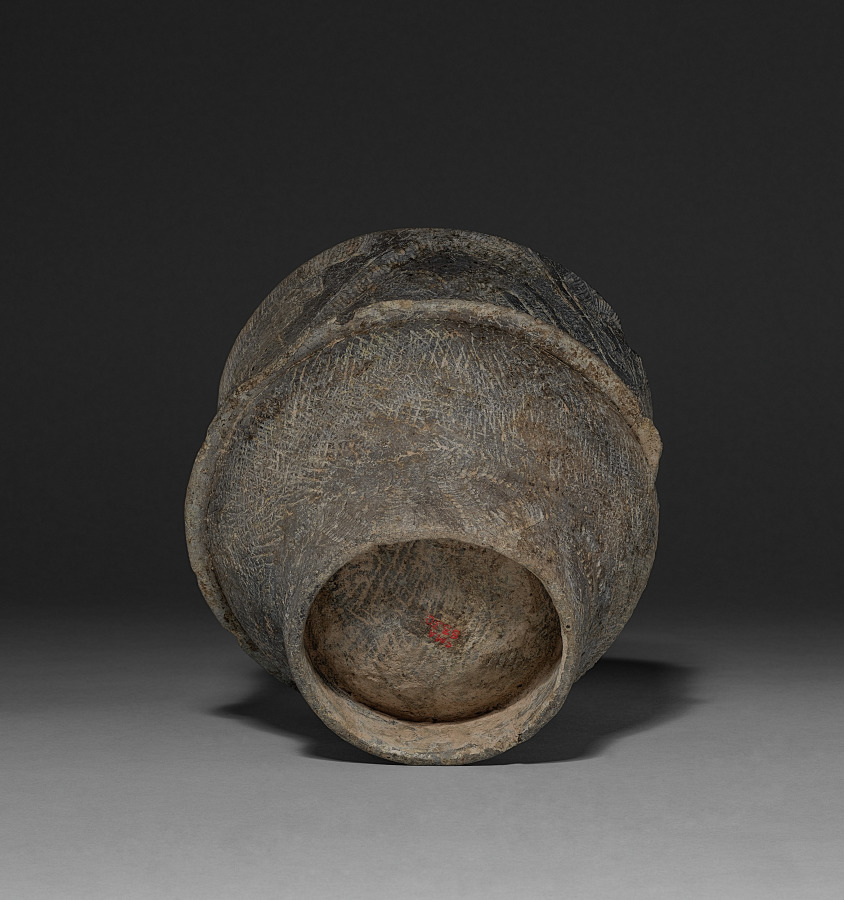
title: Jar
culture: Thailand, Ban Chiang, Neolithic Period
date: early 3000s BCE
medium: gray earthenware with incised decoration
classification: Ceramic